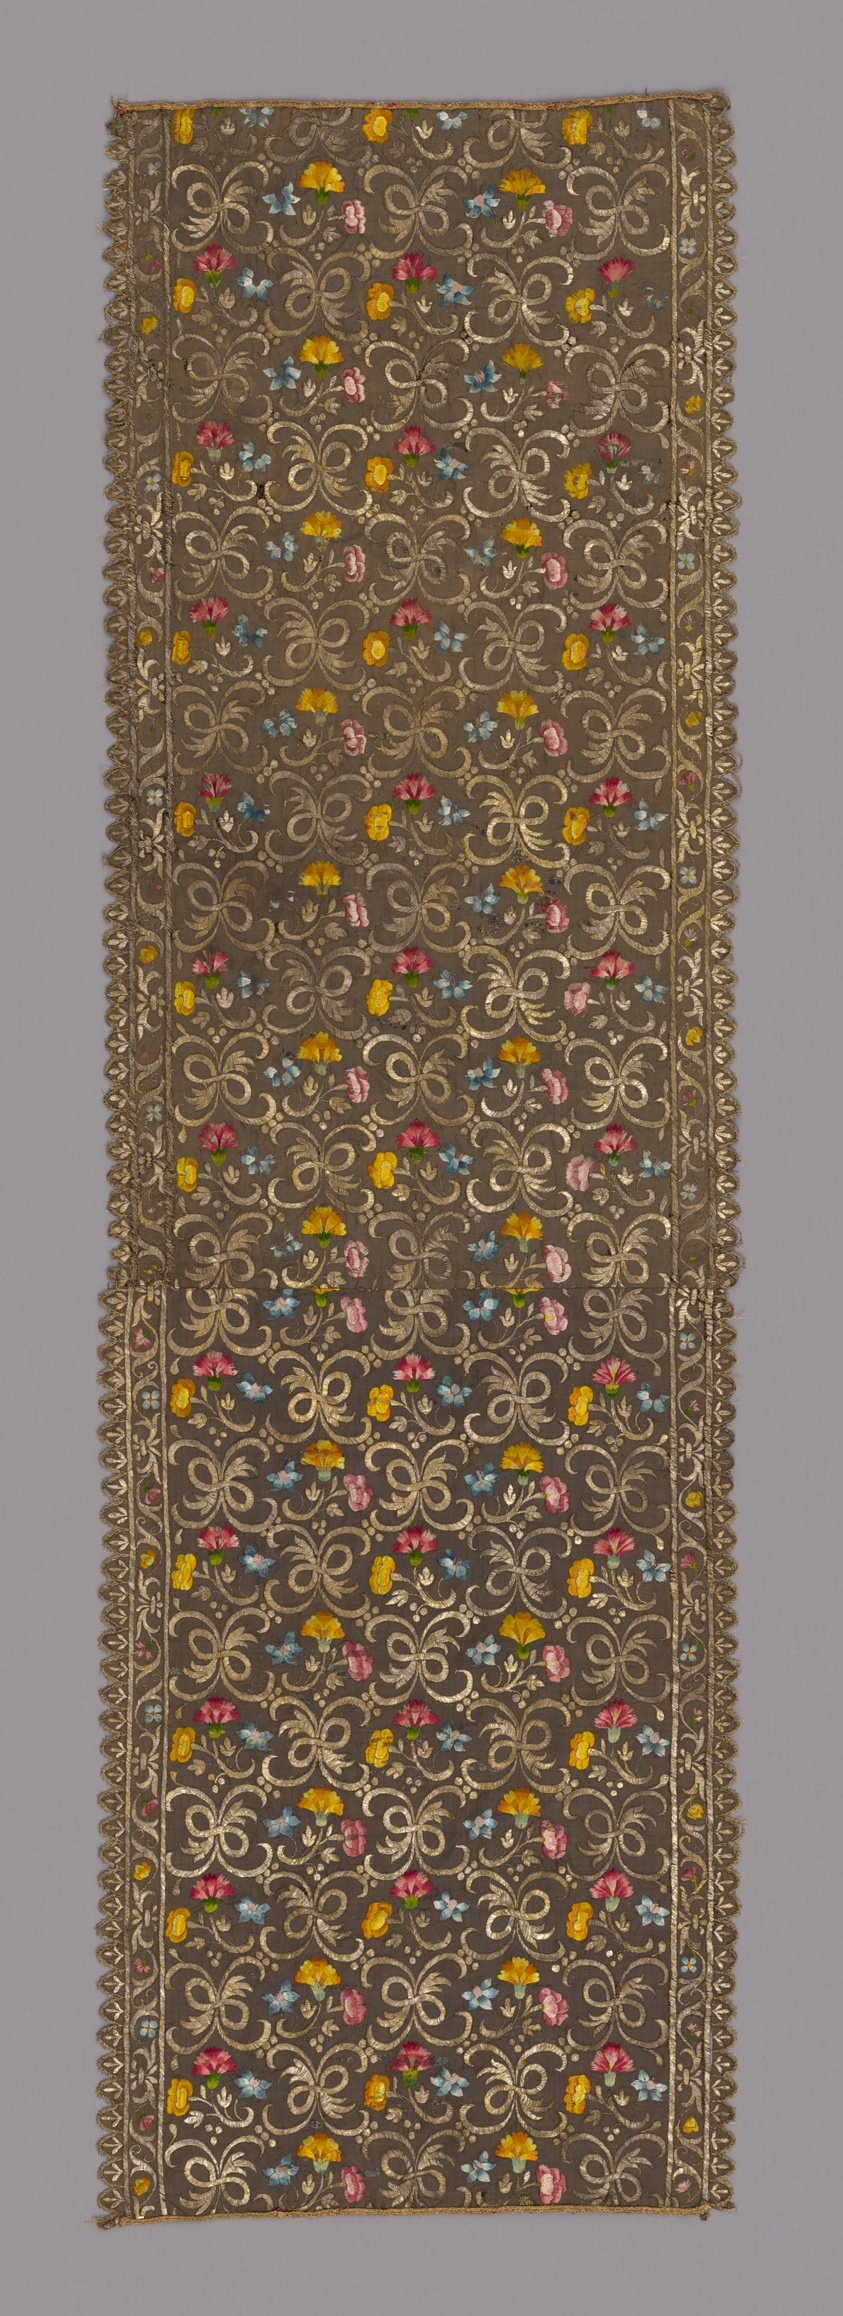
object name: Textile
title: Panel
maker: Probably Italy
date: 1550/1600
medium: Silk, plain weave; double-faced needlework embroidered with silk and gilt-metal-strip-wrapped silk in satin stitches; couching; edged with gilt-metal-strip-wrapped silk, bobbin straight lace and with silk and gilt-metal-strip-wrapped silk, plaited braid; two panels joined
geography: Italy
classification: textile; needlework (visual works)